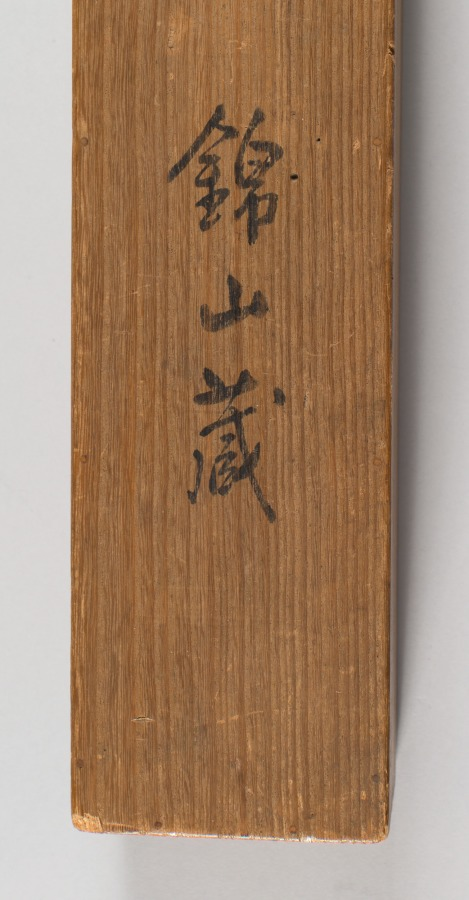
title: Solitary Colors of the Autumn Woods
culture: China, Ming dynasty (1368–1644)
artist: Wang Jianzhang (Chinese, active 1621–1662)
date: first half 1600s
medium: hanging scroll; ink and color on satin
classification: Painting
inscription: Artist's inscription, signature, and 2 seals: Cold frost falls on the fences,/ Solitary colors scatter the maples./ Reciting the chapter of "The Autumn Water,"/ I cannot still the emotion in my old heart. After the style of Fan Hua-yüan [Fan Kuan], Wang Chien-chang . [seals] Wang shih chih yin; Chien-chang. trans. LYSL/HK/WKH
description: Two gentlemen stand outside a thatched hut in a dense forest; some trees have bare branches indicating that the season is early autumn. Wang Jianzhang’s inscribed poem refers to a chapter called “Autumn Water” from Zhuangzi, a famous Daoist text written in the 3rd century BC: "Cold frost falls on the fences, / Solitary colors scatter the maples. / Reciting the chapter of “The Autumn Water,” / I cannot still the emotion in my old heart." Wang Jianzhang lived through the collapse of the Ming dynasty (1368–1644) and the rise of the Qing dynasty (1644–1911), when China was governed by the Manchus, an ethnic people from Manchuria who were traditionally viewed as “barbarians” by the Chinese. The poetic reference to Zhuangzi’s “Autumn Water” seems to discreetly convey Wang’s feelings about his country being taken over. “Autumn Water” was about learning to take steps in the foreign way, but not acquiring a foreign tongue. Perhaps Wang was lamenting his conflicted situation. For survival he had to adapt to the new political and social climate, while still trying to maintain his own identity and Chinese traditions.